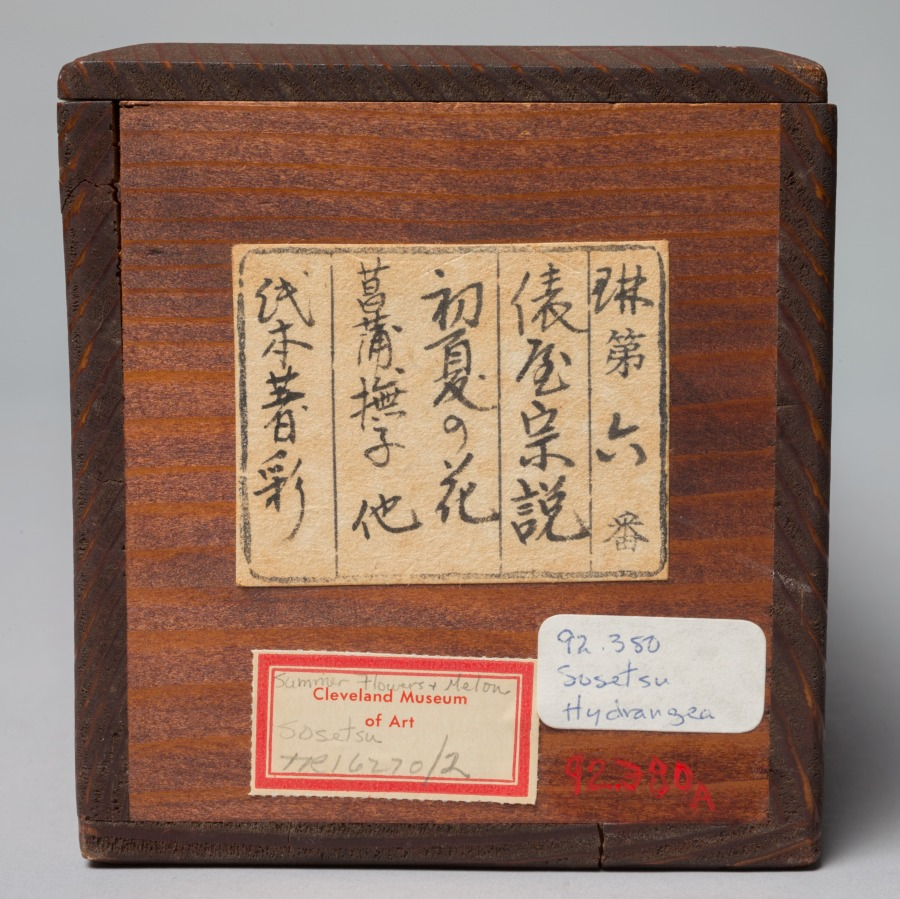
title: Summer Flowers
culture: Japan, Edo period (1615–1868)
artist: Kitagawa Sōsetsu (Japanese, active 1639–50)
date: mid-1600s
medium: hanging scroll; ink, color, and gold on paper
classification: Painting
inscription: 法橋相説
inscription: Seal: 印年 (Inen)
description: White hydrangea, orange-colored demon’s lantern, and greenbrier vine appear together in this scroll. The artist used the dripping-in (tarashikomi) technique to create a sense of depth and dimension in the leaves of the plants. A carefully controlled brush loaded with a high ratio of water to ink or color is key to the success of this brush method. Gold lines indicate the veins of leaves and the seams of pods.